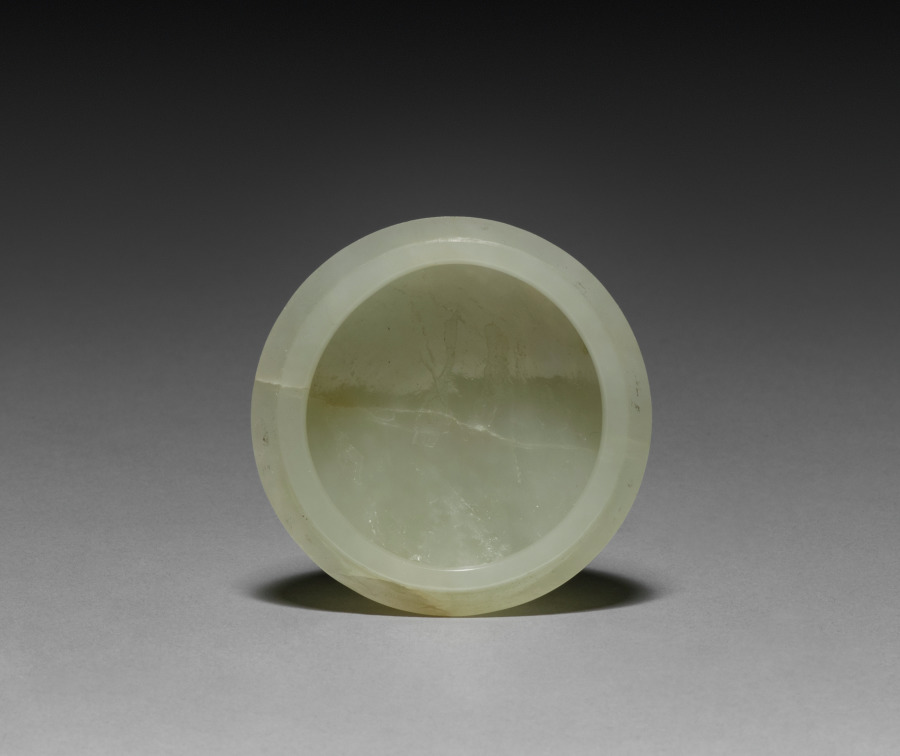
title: Box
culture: China, Qing dynasty (1644-1911)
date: 1644–1911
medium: jade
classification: Jade